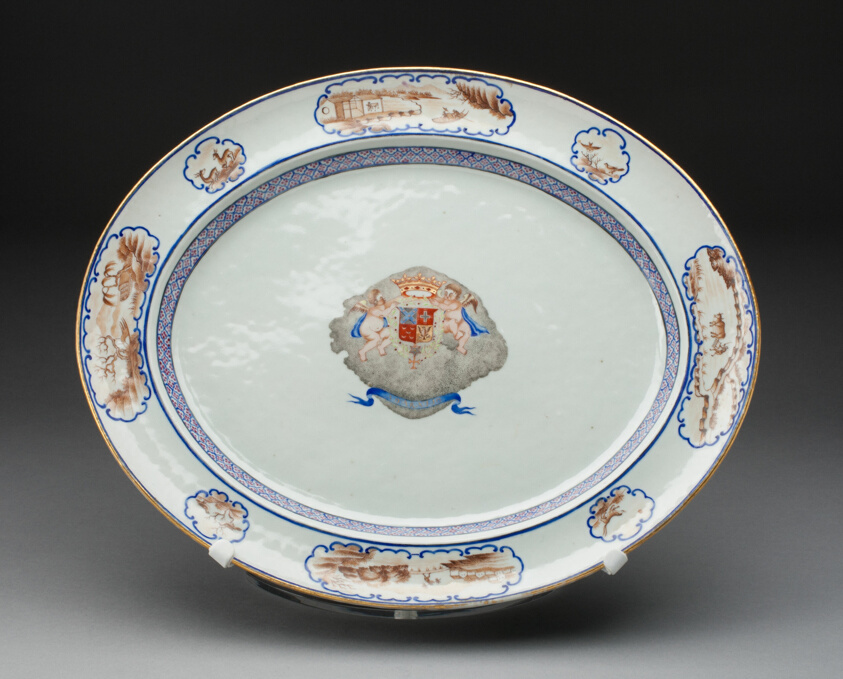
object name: Ceramics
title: Platter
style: chinese export, Chinese (culture or style), East Asian, asian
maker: China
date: 1785/1800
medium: Hard-paste porcelain with polychrome enamels and gilding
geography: Jingdezhen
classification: vessel for serving food; dish (vessel); chinese export porcelain; porcelain; european decorative arts; ceramics